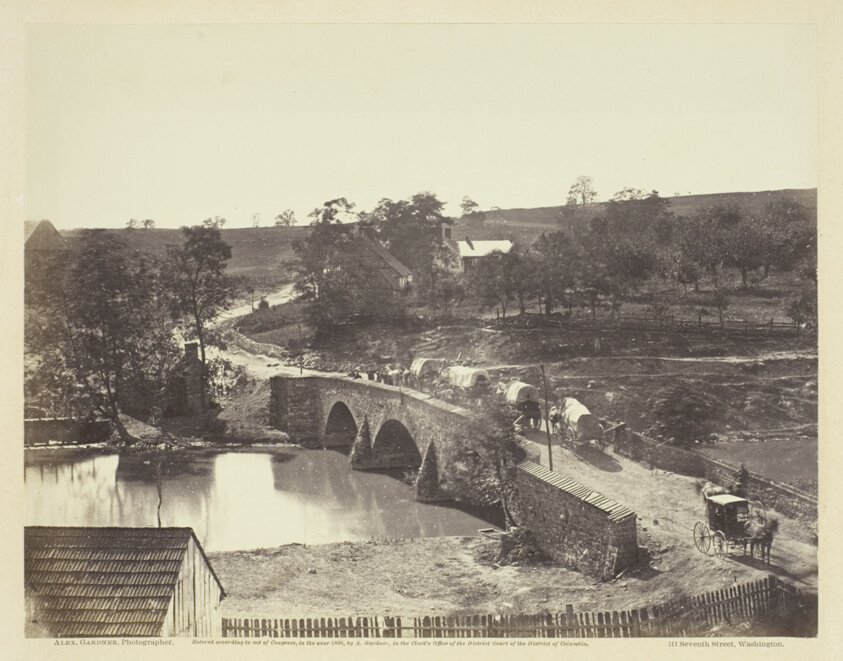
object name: Photograph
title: Antietam Bridge, Maryland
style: 19th century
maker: Barnard and Gibson (American, active 19th century)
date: September 1862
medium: Albumen print, pl. 19 from the album "Gardner's Photographic Sketch Book of the War, vol. 1" (1866)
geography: United States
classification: photograph; albumen silver print; photography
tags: Collected by Hugh Edwards, Gardner's Photographic Sketch Book